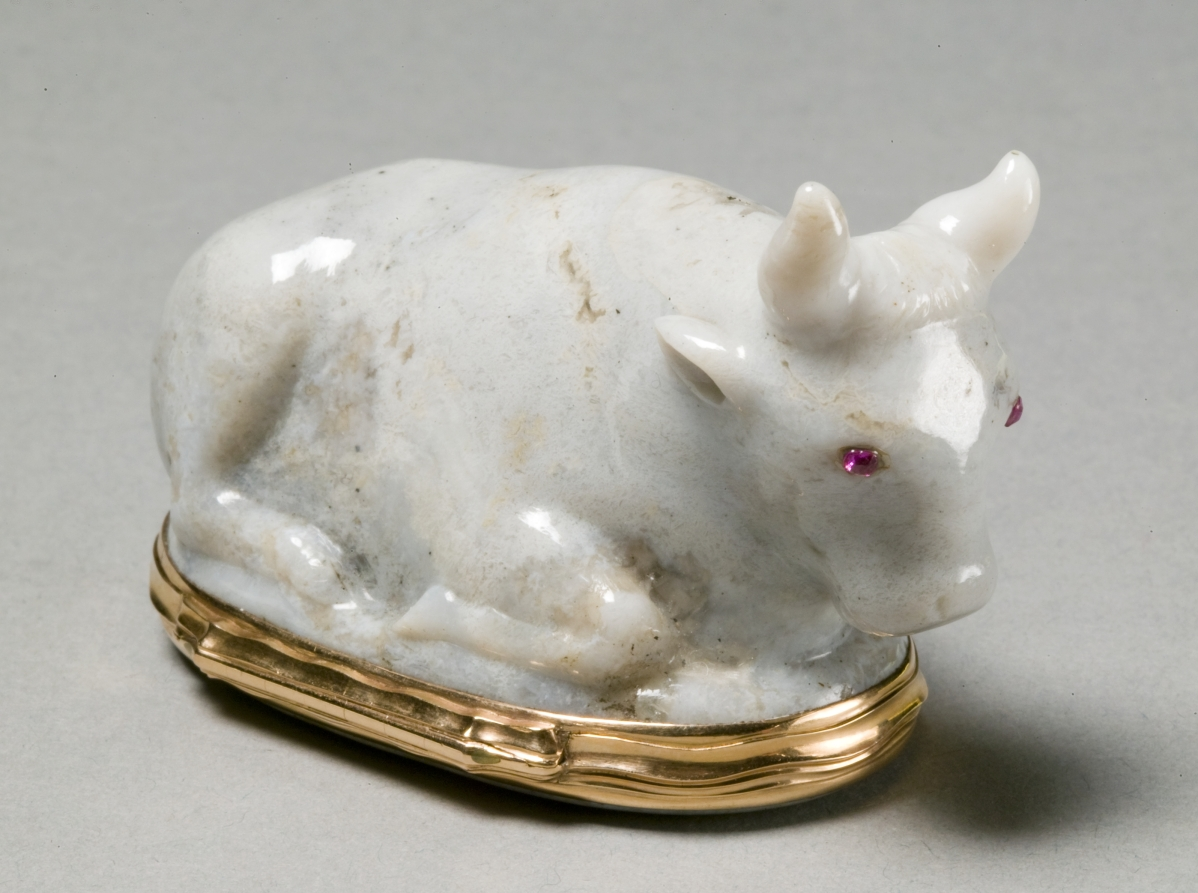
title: Snuff Box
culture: Germany, Berlin or Dresden, 18th century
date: c. 1750–60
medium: chalcedony, gold rubies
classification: Miscellaneous